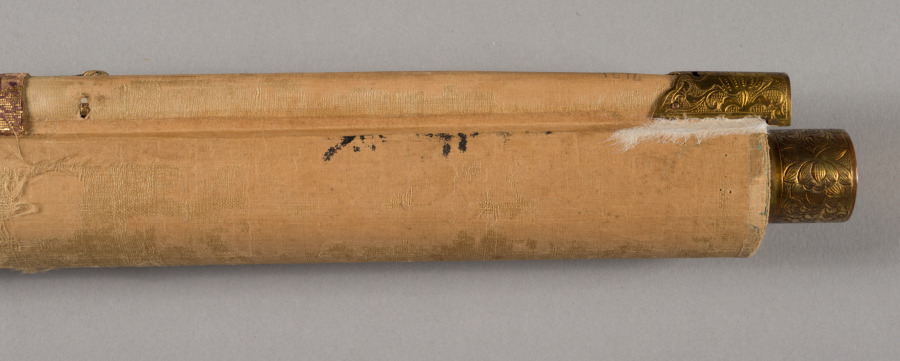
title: Monju with Five Hair Knots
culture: Japan, Kamakura period (1185–1333)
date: late 1200s–early 1300s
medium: Hanging scroll; ink, color, gold, and cut gold on silk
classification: Painting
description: This Buddhist painting shows Monju, Manjushri in Sanskrit, riding a lion. Monju is a bodhisattva, a being who, though enlightened, chooses not to become a Buddha but instead helps others achieve enlightenment. Monju’s youthfulness symbolizes his pure wisdom, unsullied by the world, and his five hair knots represent his vow to keep calamity at bay. The supernatural nature of his lion is emphasized by its hair, every strand painted in gold, as well as by the lotus platforms beneath each of its feet. The boy’s bejeweled body and silk finery is meant to resemble that of an Indian prince.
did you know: This painting is exemplary of the Kamakura period, known for artworks with special attention paid to the realism of images.